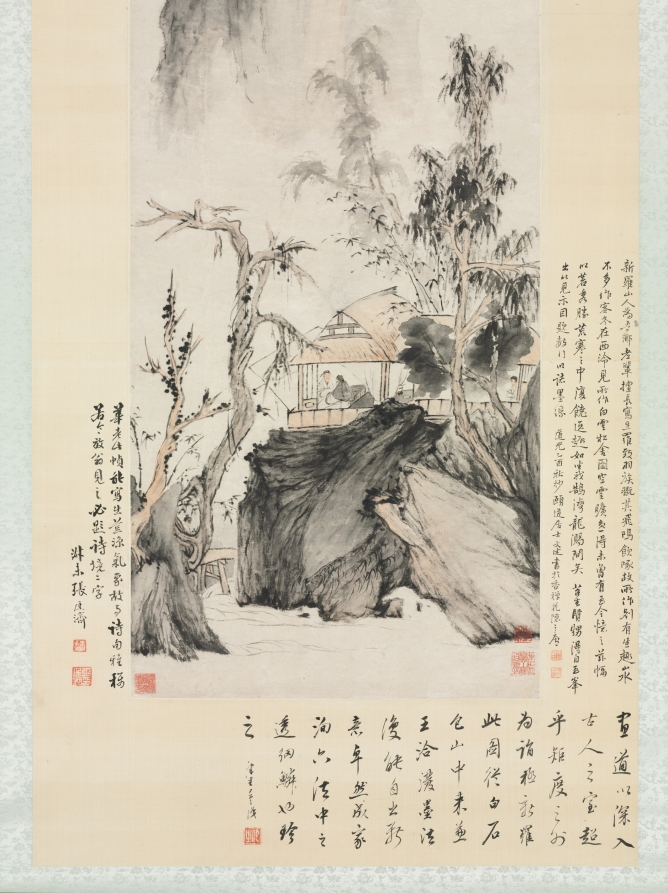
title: Conversation in Autumn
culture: China, Qing dynasty (1644-1911)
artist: Hua Yan (Chinese, 1682–c. 1765)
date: 1732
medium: Hanging scroll; ink and light color on paper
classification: Painting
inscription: Artist's inscription, signature, and 2 seals: On a winter day in the renzi year [1732], while leisurely sitting in my mountain pavilion, I happened to have imitated the brush style of Yuan masters on the two verses: "A guest came from the dusty world for a visit; in the small cottage we talked about the sound of autumn." Xin luo shan ren 新羅山人 [seals] Hua Yan 華喦; Qiuyue 秋岳.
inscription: 1 colophon and 2 seals of Zhang Tingji 張廷濟 (1768–1848): Old Hua [Yan], in this painting, was able to evoke the mood of desolation in nature and match the poetry elegantly. If Fangweng [Lu You 陸游 (1125–1210)] saw this, he would inscribe the painting with two words "idyllic world 詩境."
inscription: 新羅山人為吾鄉老輩，擅長寫生。羅致羽族，翫其飛鳴飲啄。故所作別有生趣。山水不多。作客冬在西泠，見所白雲松舎圖。空靈曠逸，得未曾有，至今憶之。兹幅以蒼秀勝，荒寒之中，復饒逸趣。如坐我鵠灣、龍瀃間矣。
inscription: 1 colophon and 1 seal of Zhu Angzhi 朱昂之 (1764–1841): The highest achievement in the art of painting is to penetrate deeply into the chamber of old masters, but at the same time transcend the bounds of conventional rules. This painting of Xinluo is derived from [the style of] Baishi (Shen Zhou 沈周, 1427–1509) and Baoshan (Lu Zhi 陸治, 1496–1576) with splashed-ink technique of Wang Qia 王洽 (Wang Mo 王默, ?–805), in addition to his own innovative ideas. Hence the distinctive style. Truly, he is one of those who passed through the net of the Six Canons [of Xie He 謝赫, 479–502]; treasure it.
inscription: 2 seals of Ye Tingguan 葉廷琯 (b. 1791); 1 seal unidentified.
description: Two figures sit conversing in a thatched cottage. This painting illustrates two poetic lines: My guest came to sit beyond the dust, In a narrow room, we talked about the autumnal sounds of autumn. Hua Yan presented an intimate world—simple and rustic—amid a landscape. The cool wilderness depicted in this work conveys an aloofness that may reveal the inner world of a scholar-artist who failed the civil service examination but preserved a sense of pride and endurance in his humble surroundings.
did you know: A barren tree on the lower left has a hole in its lower trunk through which is visible a young servant carrying food to the gentlemen in the cottage.